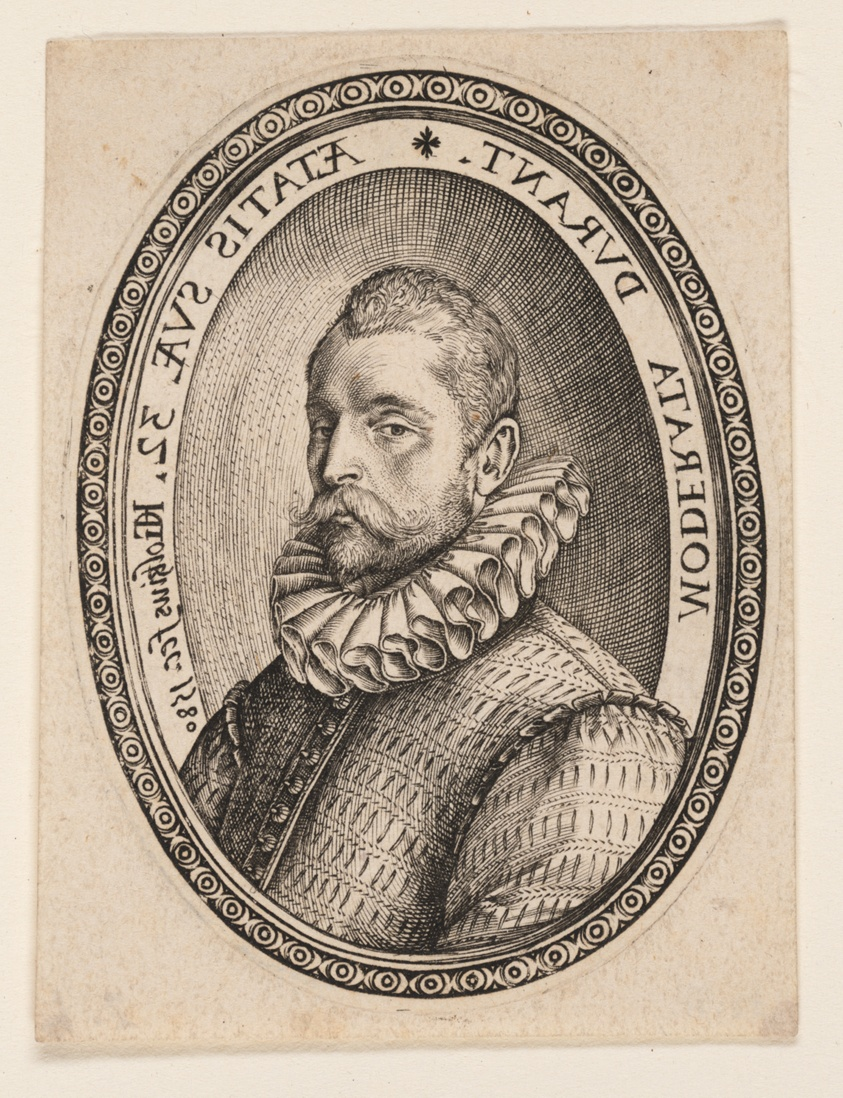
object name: Print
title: Bust of a Man Facing Left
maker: Hendrick Goltzius (Dutch, 1558–1617)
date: 1580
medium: Engraving on paper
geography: Netherlands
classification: engraving; paper; print; prints and drawing